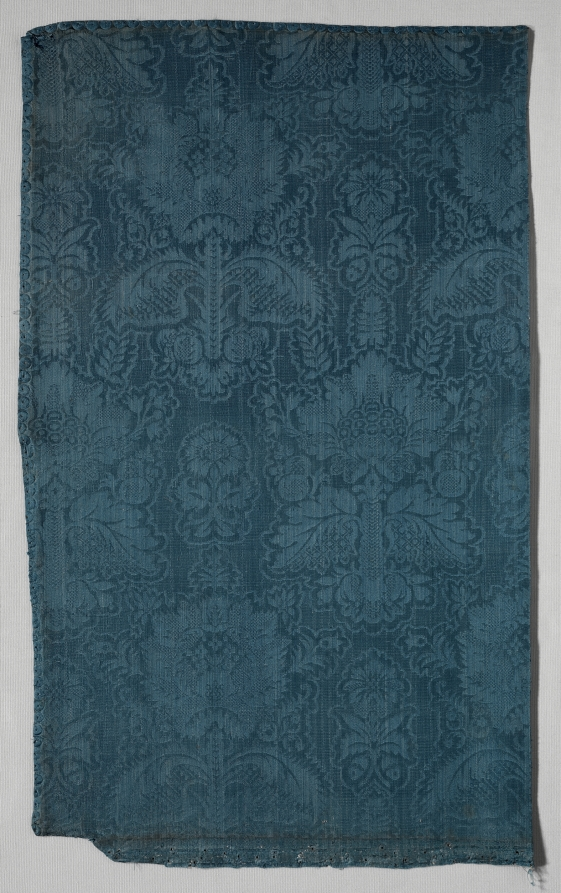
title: Fragment of Figured Silk for Upholstery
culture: France, first half of 18th century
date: 1700–1750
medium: damask and cannelé, silk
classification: Textile